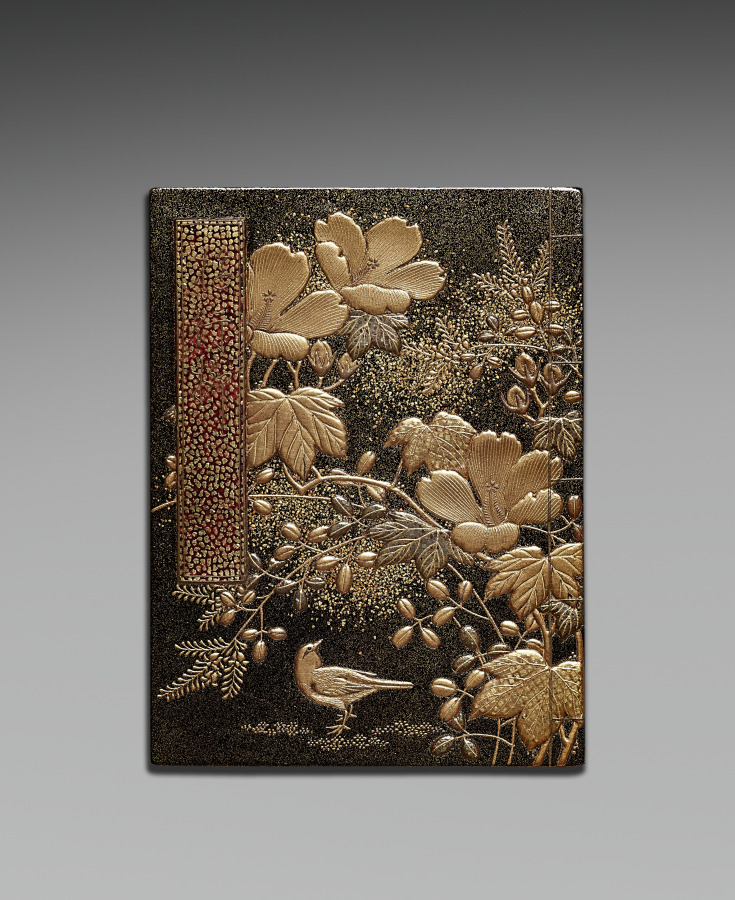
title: Nested Boxes with Chrysanthemums (inner box)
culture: Japan, Meiji period (1868–1912)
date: early 1900s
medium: lacquer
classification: Lacquer